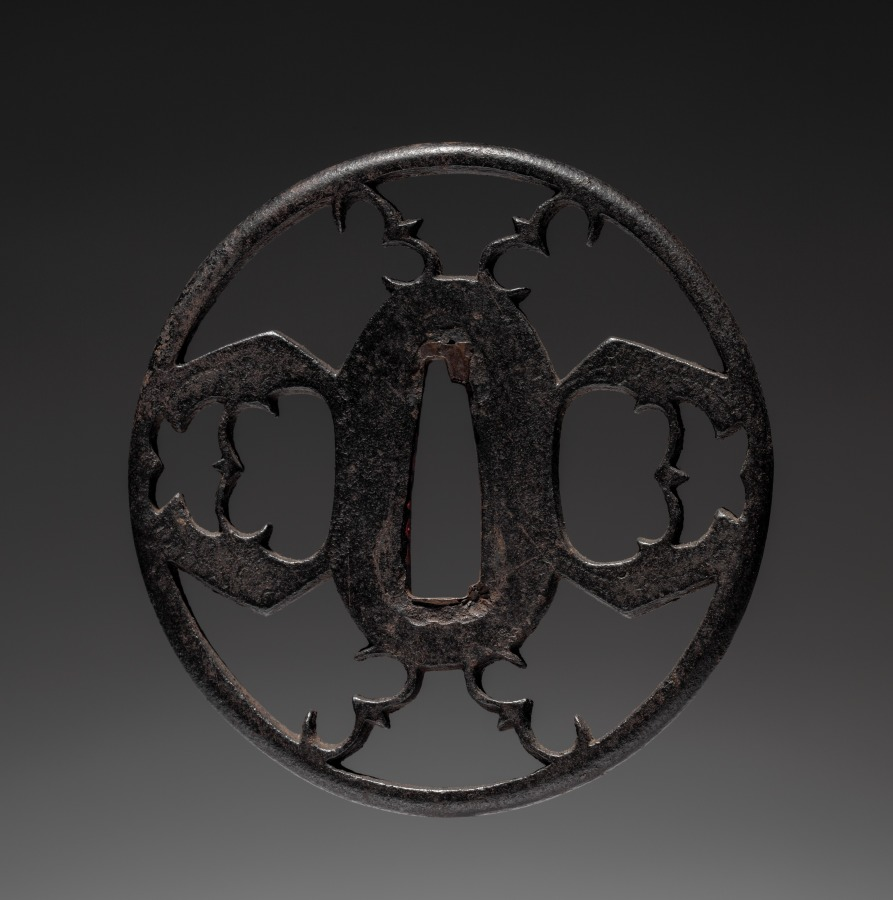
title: Sword Guard (Tsuba)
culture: Japan, possibly Edo period (1615-1868)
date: c. 1615–1868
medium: iron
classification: Arms and Armor